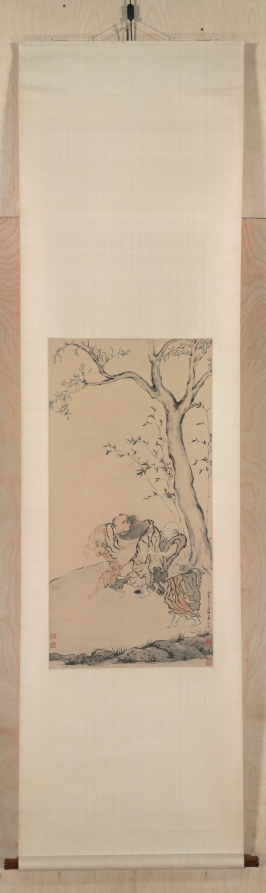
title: Zhong Kui Supported by Ghosts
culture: China, Qing dynasty (1644–1911)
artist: Luo Ping (Chinese, 1733–1799)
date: 1700s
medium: hanging scroll; ink and light color on paper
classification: Painting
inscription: 兩峰道人羅聘畫 【印】 兩峰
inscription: 4 additional seals: 3 of Dai Zhi 戴植 (19th c.); 1 of Ren Bonian 任伯年 [Ren Yi 任頤] (1840–1895)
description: In popular belief, Zhong Kui is a powerful guard against evil spirits, particularly on New Year’s Day and at the Double-Fifth Festival, on the fifth day of the fifth lunar month, when his image is displayed in households to prevent diseases and other misfortunes.